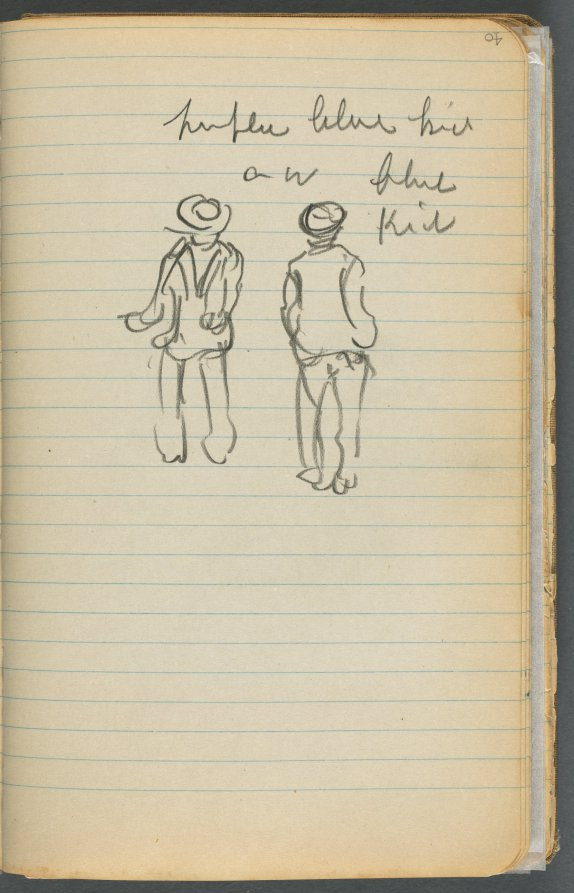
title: Sketchbook, page 040: Notes and Two Figures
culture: America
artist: Maurice Prendergast (American, born Newfoundland [now Canada], 1858–1924)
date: 1905–10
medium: graphite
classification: Bound Volume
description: This sketchbook contains 69 pages of drawings, a diary largely devoted to the state of the artist's health, and a three-page discourse on the nature of genius and ideas.